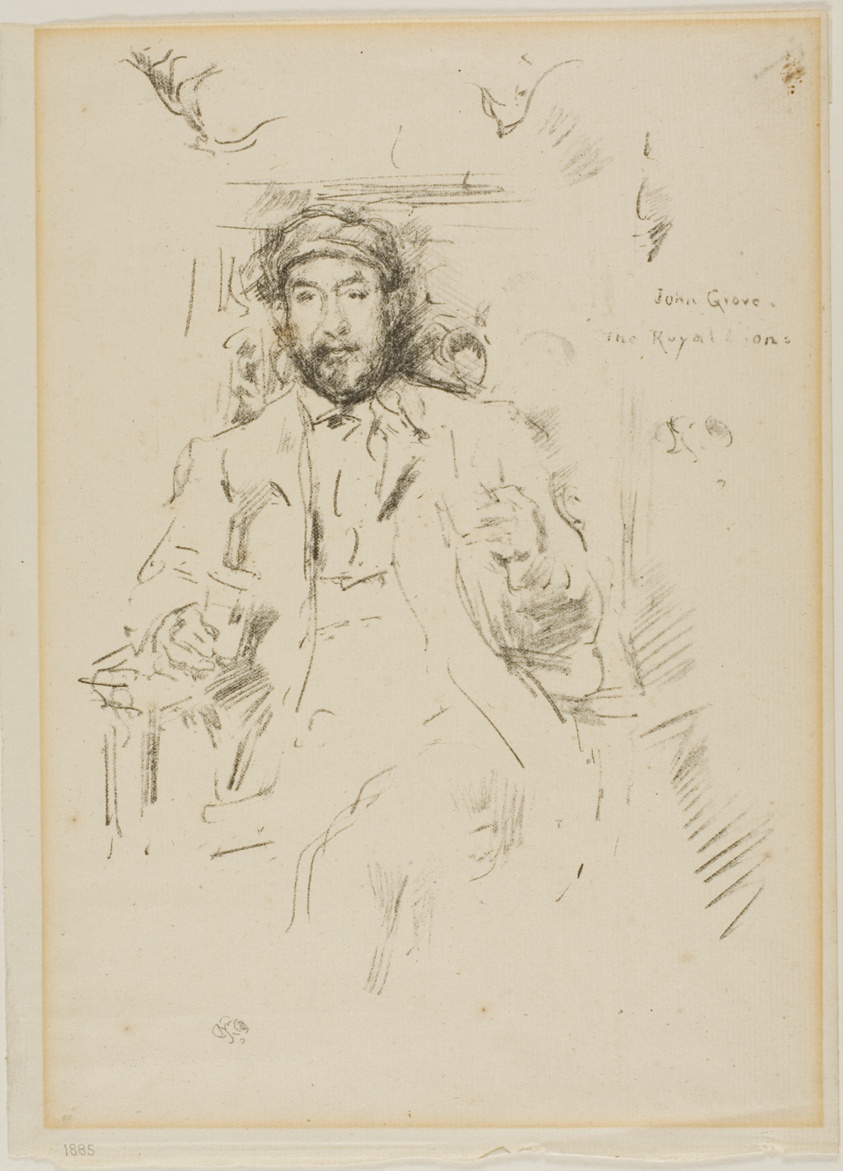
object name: Print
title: John Grove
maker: James McNeill Whistler (American, 1834-1903)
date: 1895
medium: Transfer lithograph in black on cream laid paper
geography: United States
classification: transfer lithograph; lithograph; print; prints and drawing; paper